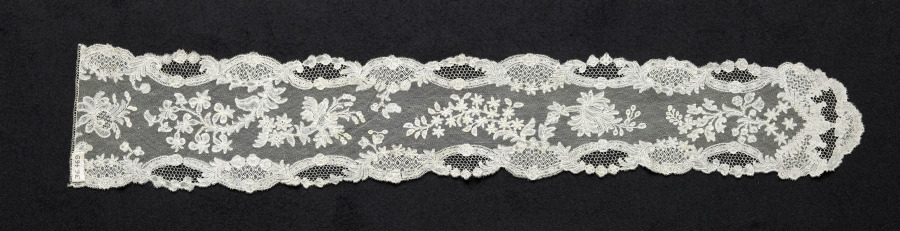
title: Lace Lappet (one of a pair)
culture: Belgium, Brussels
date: 1700s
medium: Linen: bobbin lace (Point d'Angleterre)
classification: Lace